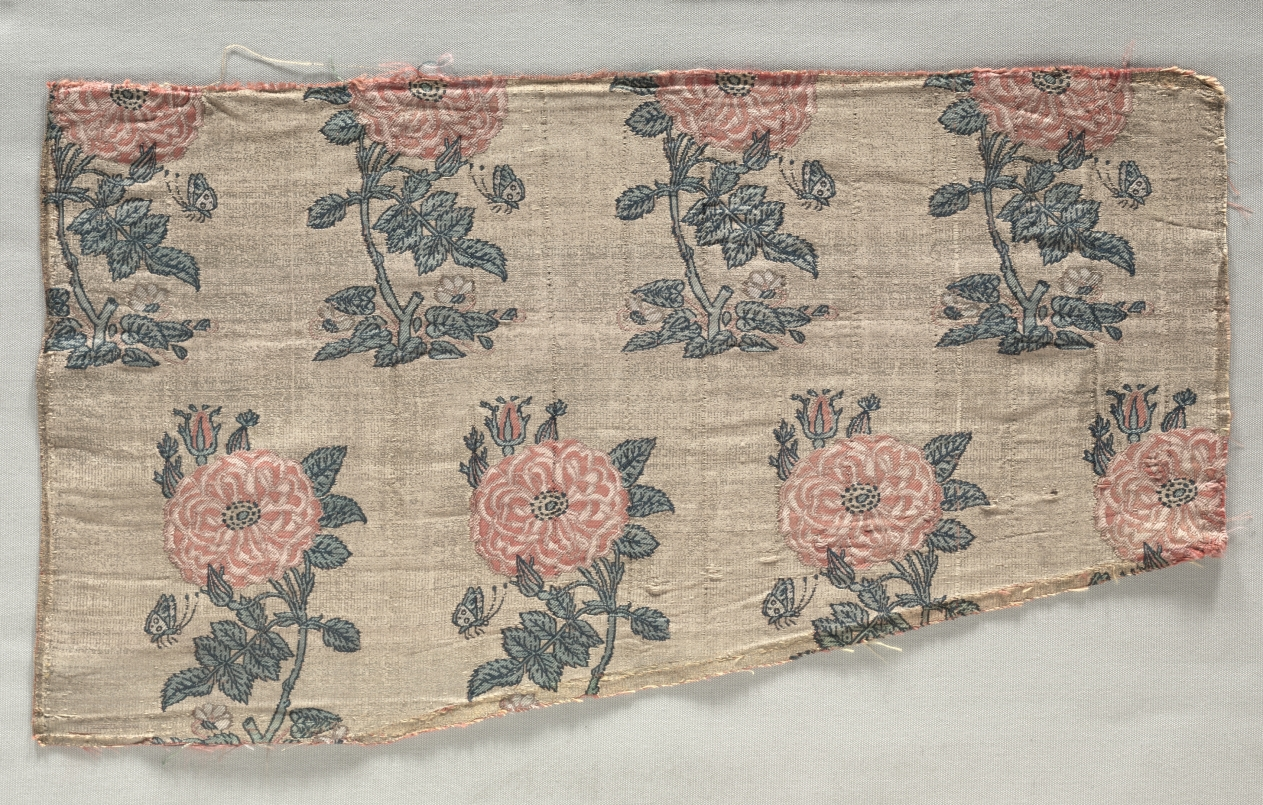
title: Fragment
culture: Iran, early 17th century (period of Shah Abbas)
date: early 1600s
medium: compound tabby ground with diasper pattern, brocaded; silk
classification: Textile